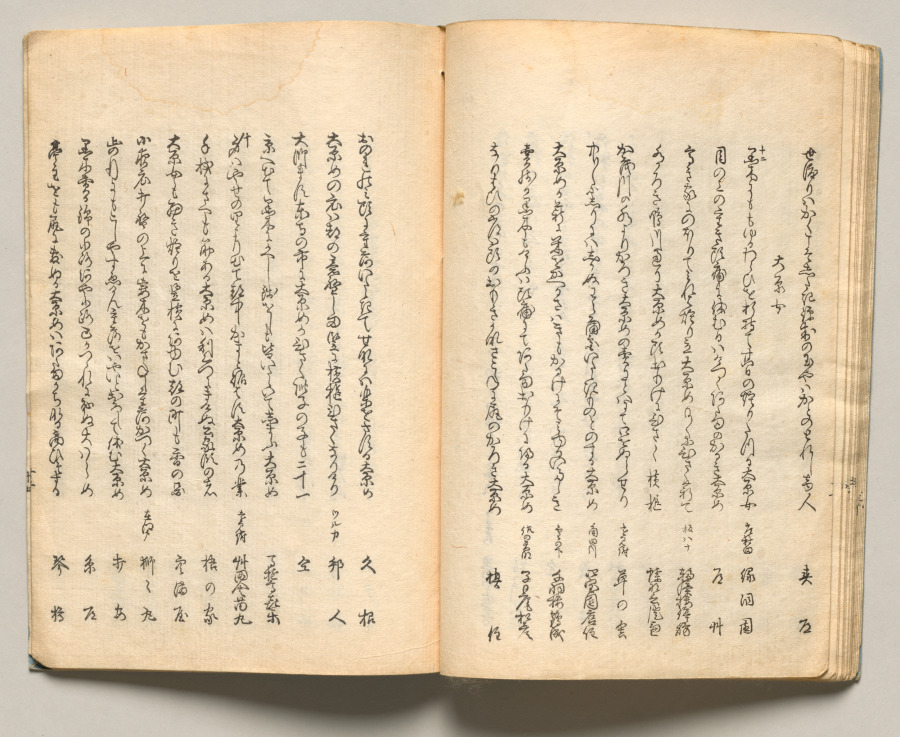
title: Spread Nineteen from Volume Three of People of Japan in Light Verse (Kyōka)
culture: Japan, Edo period (1615–1868)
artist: Utagawa Hiroshige (Japanese, 1797–1858)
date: 1857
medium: Woodblock-printed book; ink and color on paper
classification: Bound Volume